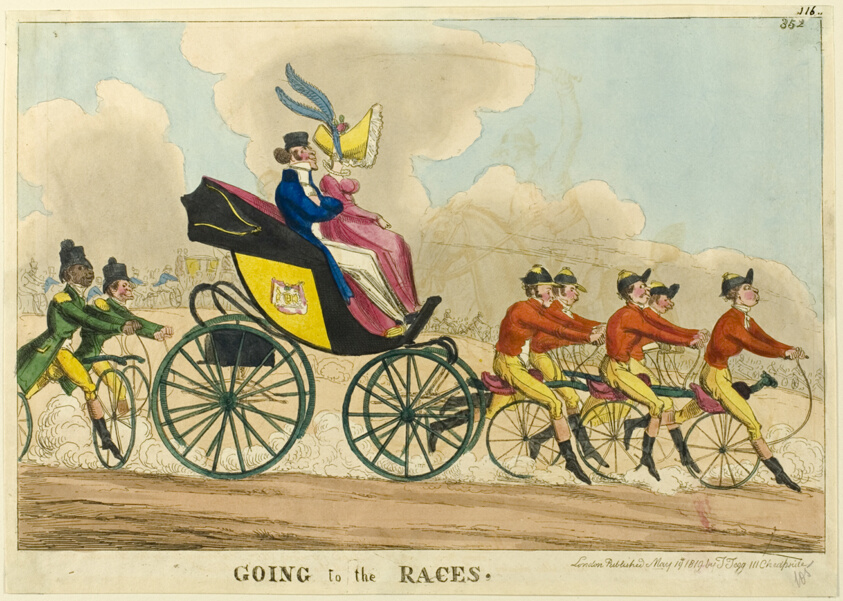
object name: Print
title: Going to the Races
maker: Attributed to William Heath (English, 1794-1840); published by Thomas Tegg (English, 1776-1845)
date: published May 14, 1819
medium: Hand-colored etching on ivory wove paper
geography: England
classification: etching; print; prints and drawing